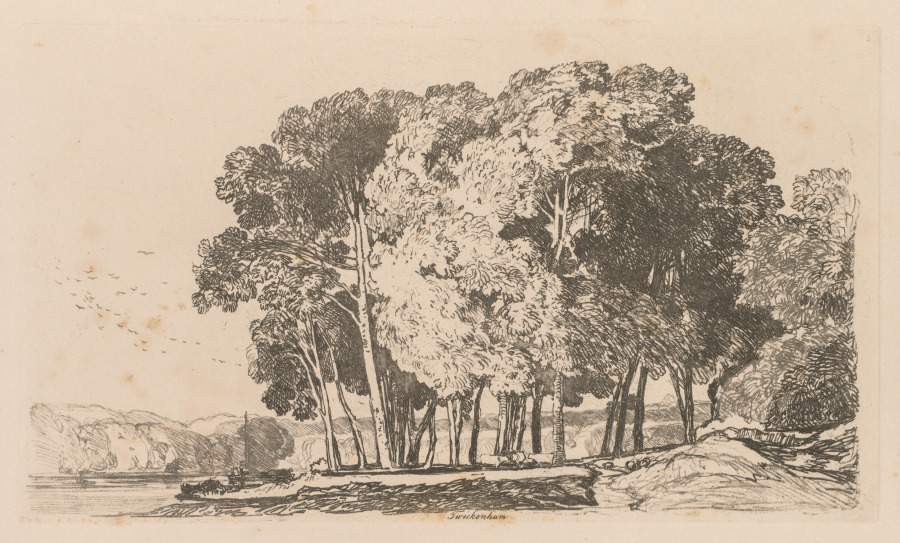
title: Liber Studiorum: Plate 3, Trees near Twickenham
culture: England, 19th century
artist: John Sell Cotman (British, 1782–1842)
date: 1838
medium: softground etching, from a bound volume containing 48 plates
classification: Bound Volume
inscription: In plate, within image, upper right: 3; in plate, below image: Twickenham